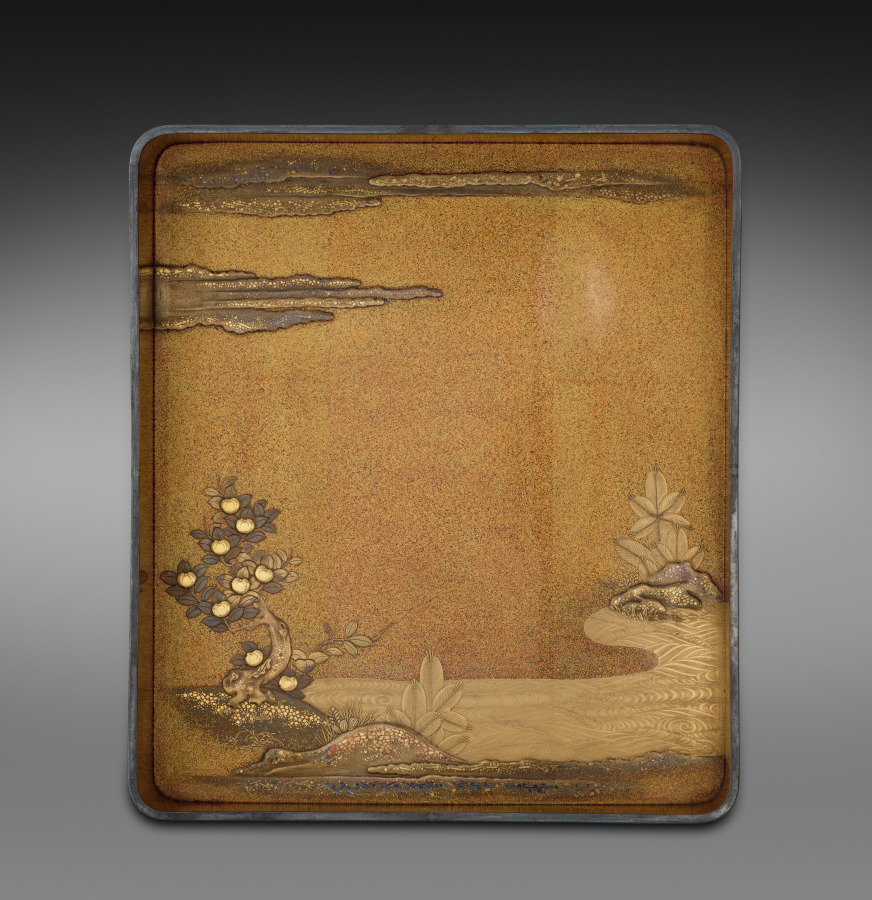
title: Writing Box (Suzuribako) with the “First Song” (Hatsune) Chapter from the Tale of Genji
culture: Japan, Meiji period (1868–1912)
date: early 1900s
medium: Lacquered wood with gold and silver sprinkled powder (maki-e), foil application (kirikane), and metal inlay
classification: Lacquer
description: The design of this box was inspired by an object in the 1639 lacquer wedding set of Chiyohime, the daughter of the shogun (ruler). Information about the set became available in the Meiji period, leading some lacquer artists to emulate its designs. This box features a scene from the chapter “First Song” (Hatsune) of the Tale of Genji, in which Prince Genji and his love Murasaki enjoy her garden. It incorporates the written characters for “first” (初, hatsu) and “sound” (音, ne), indicating the first song of the warbler in spring, associated with the new year—the water dropper for mixing the ink is in the shape of this bird.